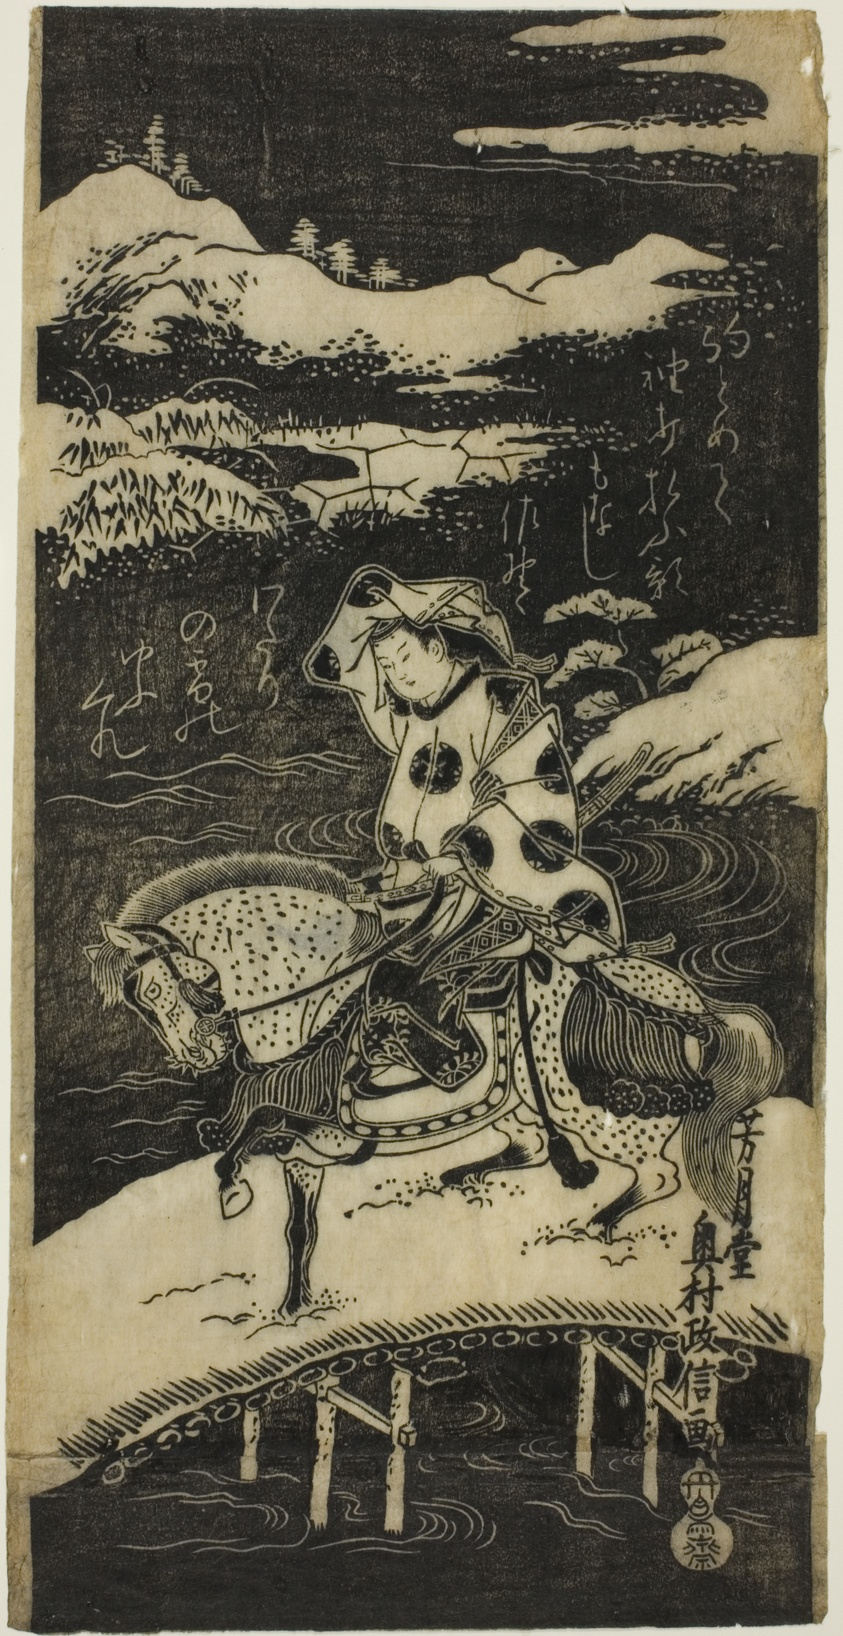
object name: Print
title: Crossing the River at Sano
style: Japanese (culture or style)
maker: Okumura Masanobu (Japanese, 1686-1764)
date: 18th century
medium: Woodblock print; hosoban, ishizuri-e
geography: Japan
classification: woodblock print; print; asian art; woodblock